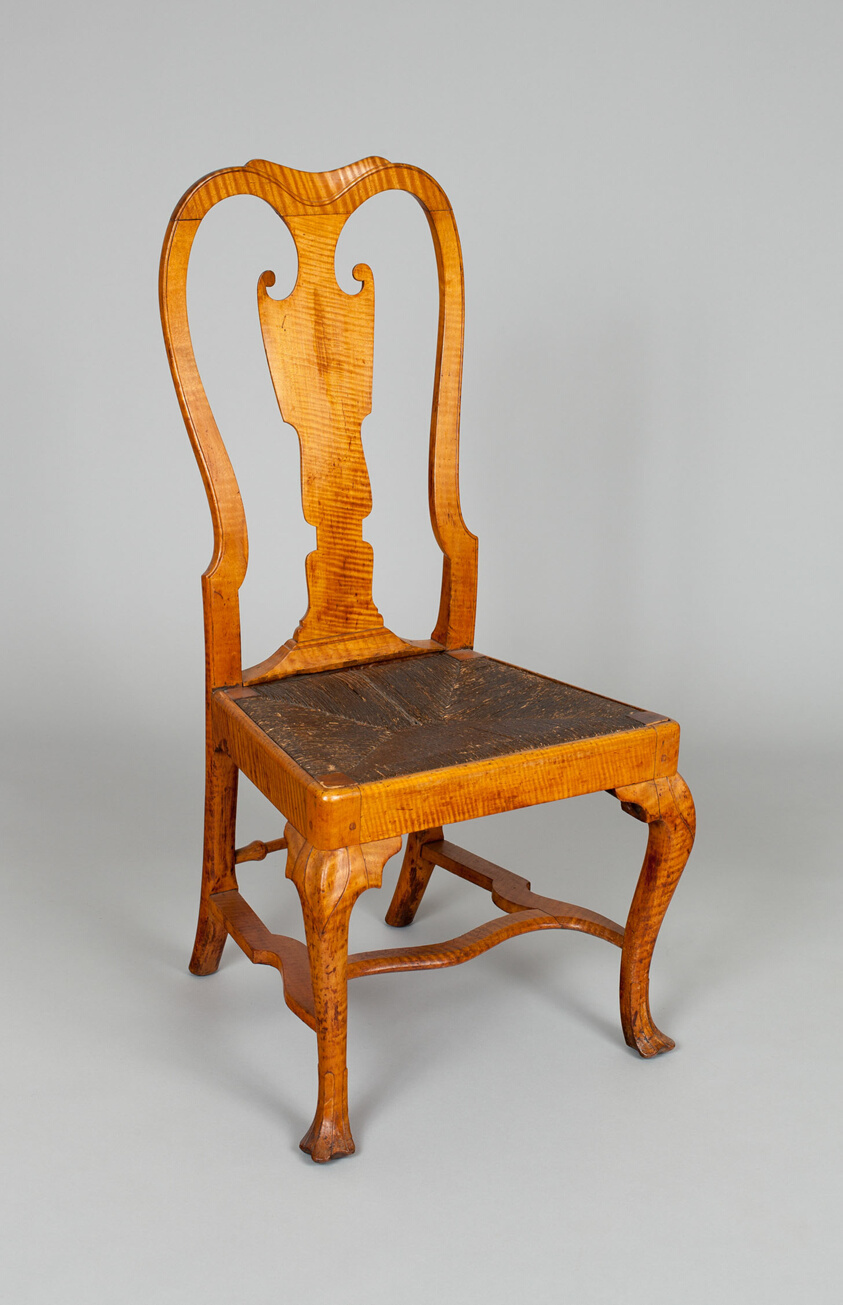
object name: Furniture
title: Side Chair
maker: Artist unknown (American, 18th century); Philadelphia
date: 1746–60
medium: Maple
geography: Philadelphia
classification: seating; furniture; american decorative arts; american arts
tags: furniture